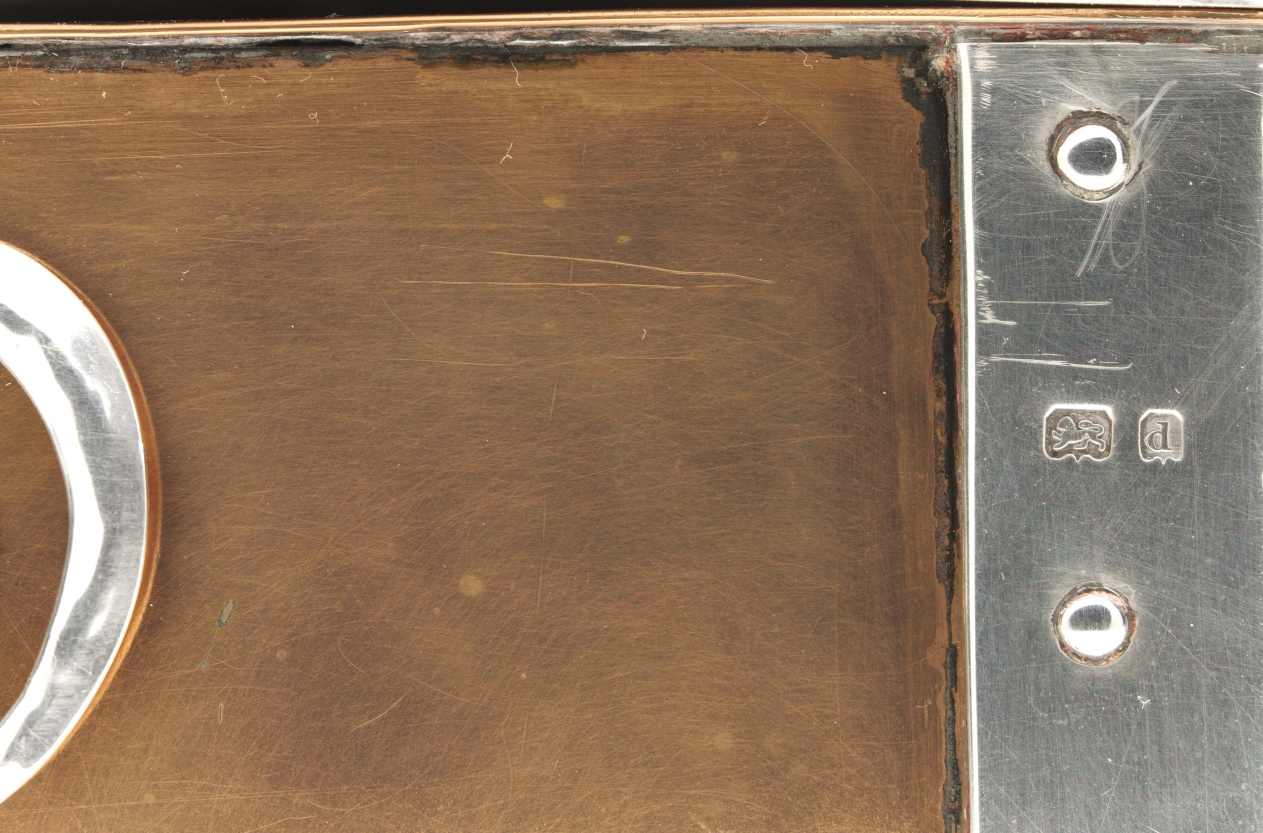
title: Covered Box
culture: England, Birmingham, early 20th Century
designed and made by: A. Edward Jones (British, 1878–1954)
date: 1903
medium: silver, copper, ceramic with wood lining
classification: Metalwork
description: British designer Albert Edward Jones founded A. Edward Jones in 1902, an Arts and Crafts metalworking firm that primarily produced ecclesiastical and domestic objects at the time of this box's creation. The box combines silver and copper metalwork, sleekly designed with limited embellishment.